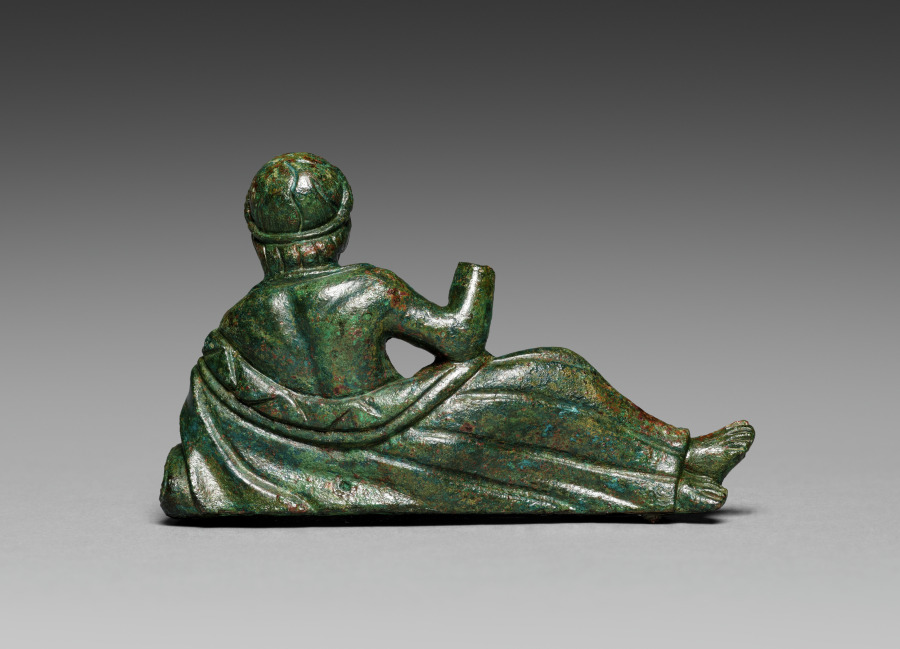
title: Vessel Ornament of Banqueter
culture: Etruscan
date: probably 400–375 BCE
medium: bronze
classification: Sculpture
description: This bronze banqueter figurine was one of six once adorning the rim of a large basin, now lost. Cast in molds with individualized details, most have grooves on their underside to attach to the basin. Minute traces of gilding remain on areas of clothing and skin (mostly visible only under magnification), suggesting that they may have been completely gilded. Two handles in the form of hippocampi, horses with serpentine tails, also belonged to the basin and are now displayed at the Michael C. Carlos Museum at Emory University. The basin may have been used to hold liquid for a banquet, or was perhaps funerary. This reclining bronze figurine’s left arm rests on the drapery covering his shoulder. His right arm is raised and broken at the wrist. Garlands rest on his head and chest. Traces of gilding remain in the garlands and drapery folds. The figurine is very similar to 1987.157, suggesting that he may have held a phiale mesomphalos, a shallow bowl used for wine libations to the gods.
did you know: Representations like this figurine suggest that Etruscan banqueters may have worn garlands made of flowers or leaves.